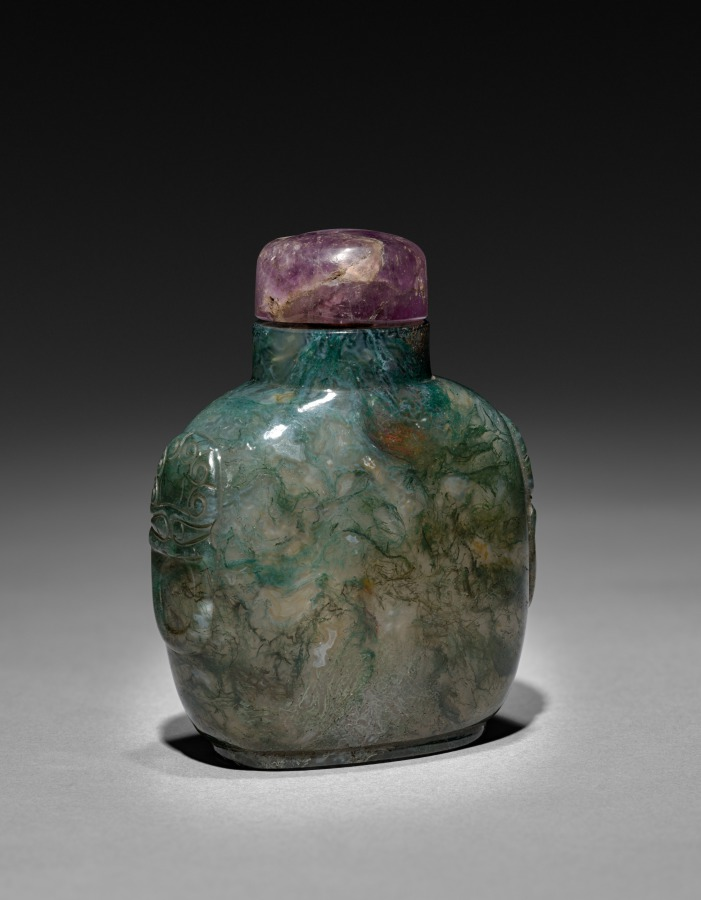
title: Snuff Bottle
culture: China, Qing dynasty (1644-1911)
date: 1644–1911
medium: glass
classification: Glass